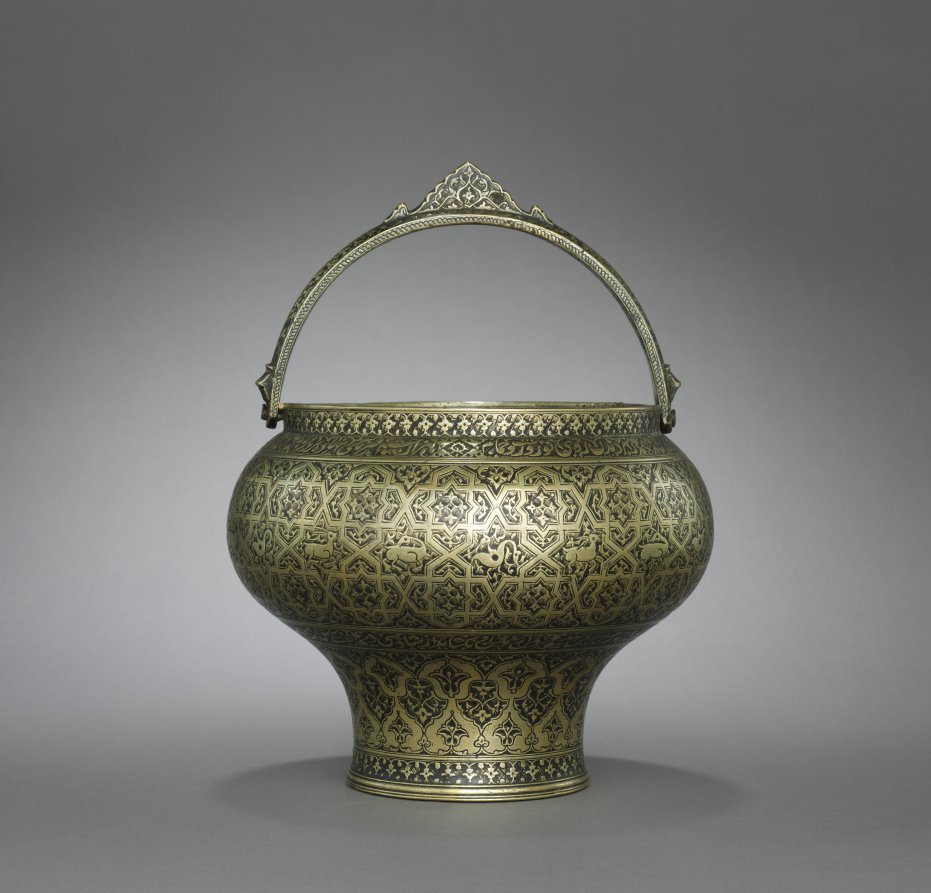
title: Bath Pail (Satl)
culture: Iran, Isfahan, Safavid period (1501-1722)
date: c. 1580–1610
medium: cast brass, turned, engraved, inlaid with black compound (niello)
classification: Metalwork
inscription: Upper band: At the breath of dawn [my Beloved] came from her house toward the Bath,/ A thousand hearts became dust on the road beneath her steps./ From seeing Your face, the bath-house day and night/ [Has] a thousand colored eyes on the door and ceiling./ As soon as my Moon [-faced Beloved] comes into the Bath,/ My eye becomes this bathing cup, and by eyebrow its handle.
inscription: Lower band: I remember an old master saying in the Bathhouse:/ One day a young person asked of an old man:/ "What is the secret that makes anyone who sets foot in the bathhouse,/ Find his saddened heart opened up to joy?"/ He said: "The secret is that the bather has nothing of the trappings of this world/ But a bathing-bowl and towel -- and even those belong to others.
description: Building on the tradition of ancient Roman baths, the hammam (public bath) was, and still is, an integral part of social life in the Islamic world. This pail was used to carry bathing equipment for a wealthy individual from their home to the hammam. It is decorated with an interlacing geometric design with a central band of repeating animals. Bathing was a popular theme with Iranian poets. On this piece, verses by the celebrated poet Jami (died 1492) relay the story of a youth inquiring as to why the hammam brings so much joy. An elder responds, “The secret is that the bather has nothing of the trappings of this world / But a bathing-bowl and towel—and even those belong to others.”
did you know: Three animal motifs are repeated within the geometric interlacing: a doe with its head turned backward; a water fowl; and a horned animal, possibly an ibex.